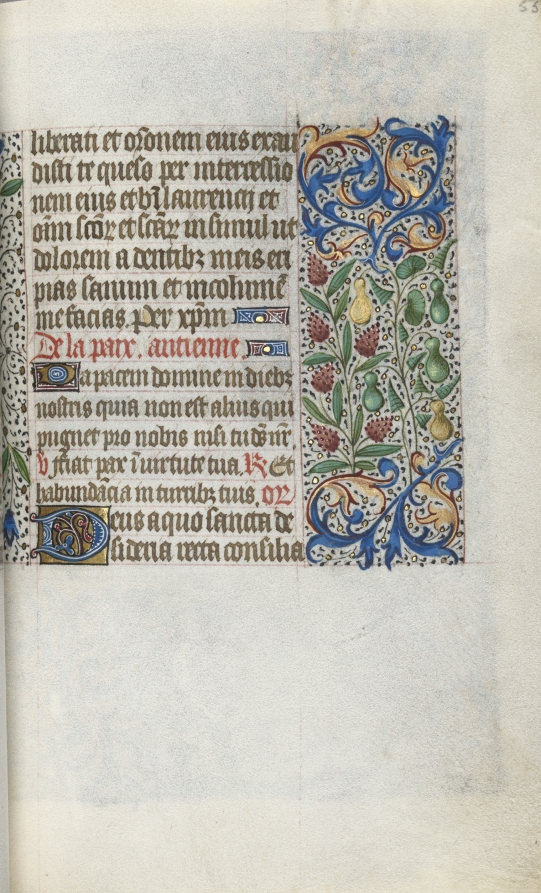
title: Book of Hours (Use of Rouen): fol. 55r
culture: France, Rouen, 15th century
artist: Master of the Geneva Latini (French, active Rouen, 1460–80)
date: c. 1470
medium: ink, tempera, and gold on vellum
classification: Bound Volume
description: In the late 1400s and early 1500s Rouen was an established and important center of book production. The city’s cathedral had a wealthy chapter that spent large sums of money to commission books and to maintain its extensive library. The stationers and booksellers would have likely been concentrated in or near the cathedral precinct. This artist, named after a manuscript now in Geneva, was Rouen’s principal illuminator during the second half of the 1400s.